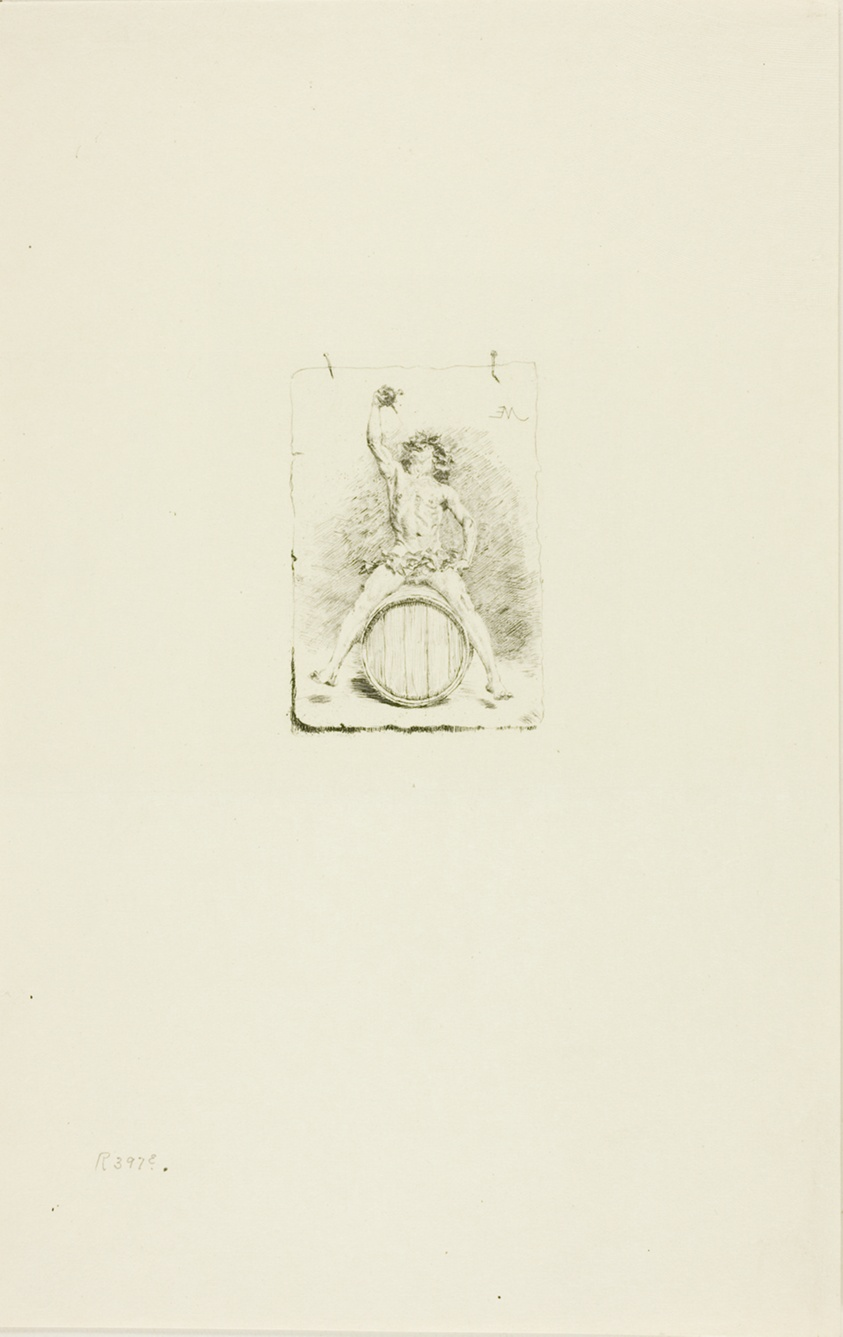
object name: Print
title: Bacchus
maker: Jean Louis Ernest Meissonier (French, 1815-1891)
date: 1887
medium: Etching and drypoint on ivory wove paper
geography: France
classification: etching; print; prints and drawing